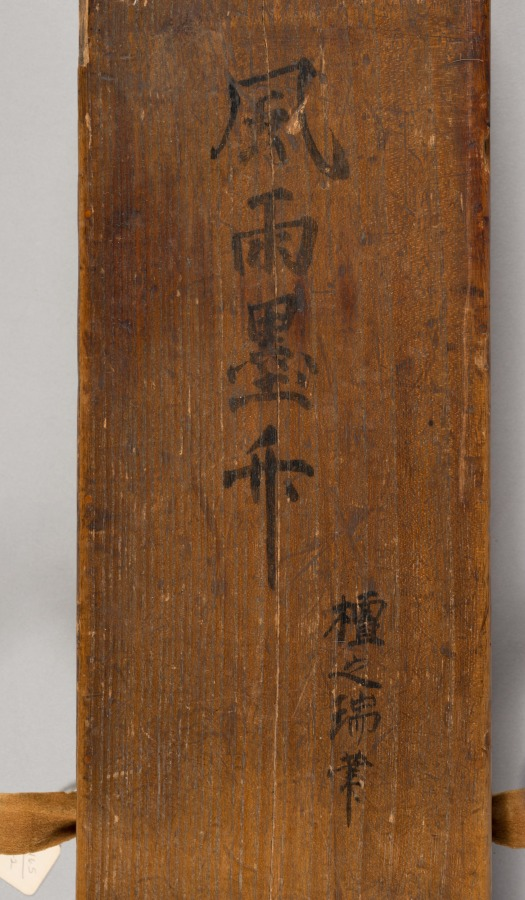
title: Bamboo in Rain; Bamboo in Wind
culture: Japan, Muromachi period (1392–1573)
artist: Genga (Japanese)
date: early 1500s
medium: hanging scroll; ink on silk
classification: Painting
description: East Asian paintings from China, Korea, and Japan were frequently conceived as sets of multiple images. These sets might have been composed for specific palace or temple rooms, or to portray a specific theme, such as the four seasons. Over time, the original intent of such sets is often lost through damage, changes in ownership, or a variety of other reasons. The identity of the artist can also be lost, but then, sometimes, retrieved. This pair of ink paintings has traditionally been labeled as Japanese and attributed to the 16th-century painter Genga. Since there are no seals or signature of the artist on the painting, this attribution was based on comparisons of brush style with paintings known to be by Genga. More recent study indicates that while the 16th century is an appropriate time frame for the pair, the precise cultural identity of the artist is not certain after all. The dark, eccentric shapes of the rocks and bamboo clusters and the dramatic tonal contrasts evident throughout the composition point to either Korean authorship or influence upon a Japanese painter of the period.